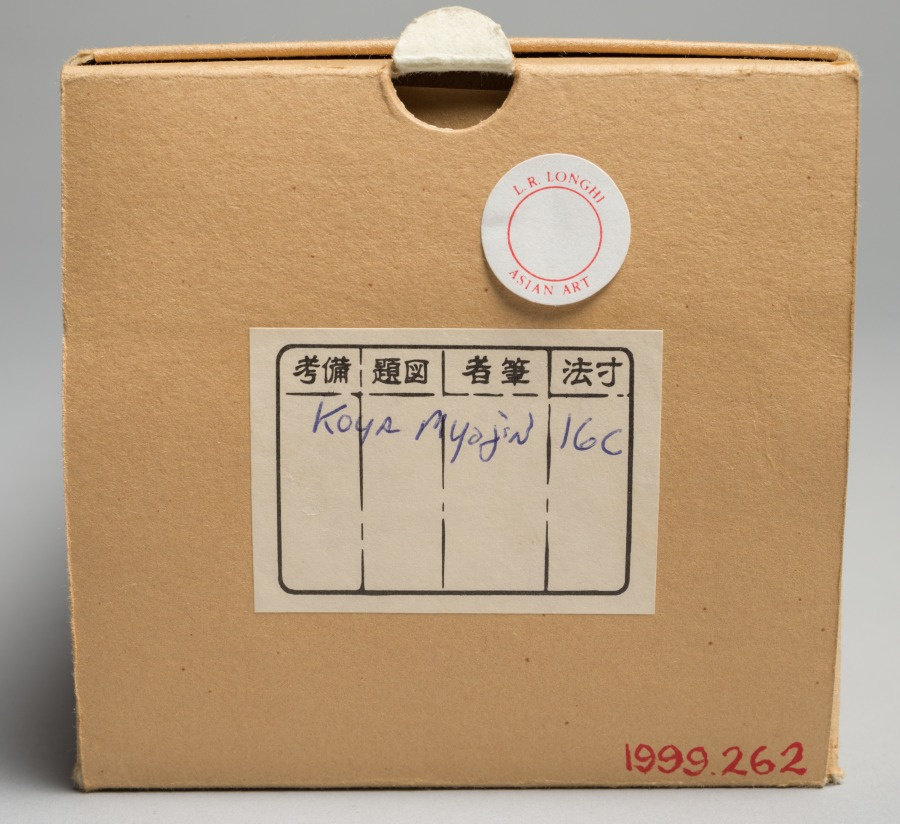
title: Mandala of the Four Deities of Mt. Kōya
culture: Japan, Muromachi period (1392–1573)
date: 1500s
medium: hanging scroll, ink, color and cut gold foil on silk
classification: Painting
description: The two kami, or deities, at the top of this painting are Kariba Myōjin and Niu Myōjin. They inhabit Mount Kōya and are described as son and mother. They are shown here as courtiers, with Kariba in Japanese-style court robes and Niu in robes modeled after court garments of the Tang dynasty. The two kami seated beneath are Kehi Myōjin, portrayed as a lady holding a whisk, and the youthful Miyajima Myōjin, with his hair drawn up in loops, playing a lute (biwa). Hōjō Masako (1157–1225), the wife of the first Kamakura shogun (leader) Minamoto Yoritomo (1147–1199), invited them to Mount Kōya.